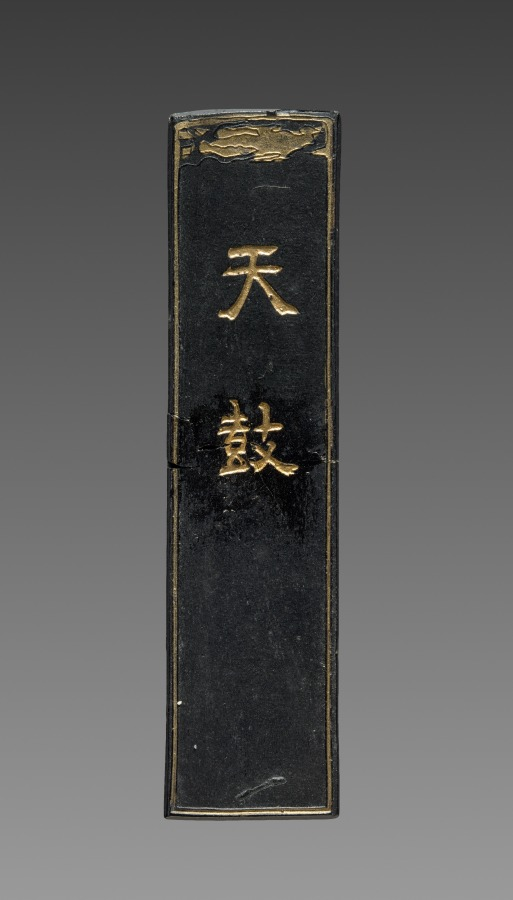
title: Ink Cake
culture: China, Qing dynasty (1644-1911)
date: 1644–1911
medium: ink cake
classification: Miscellaneous